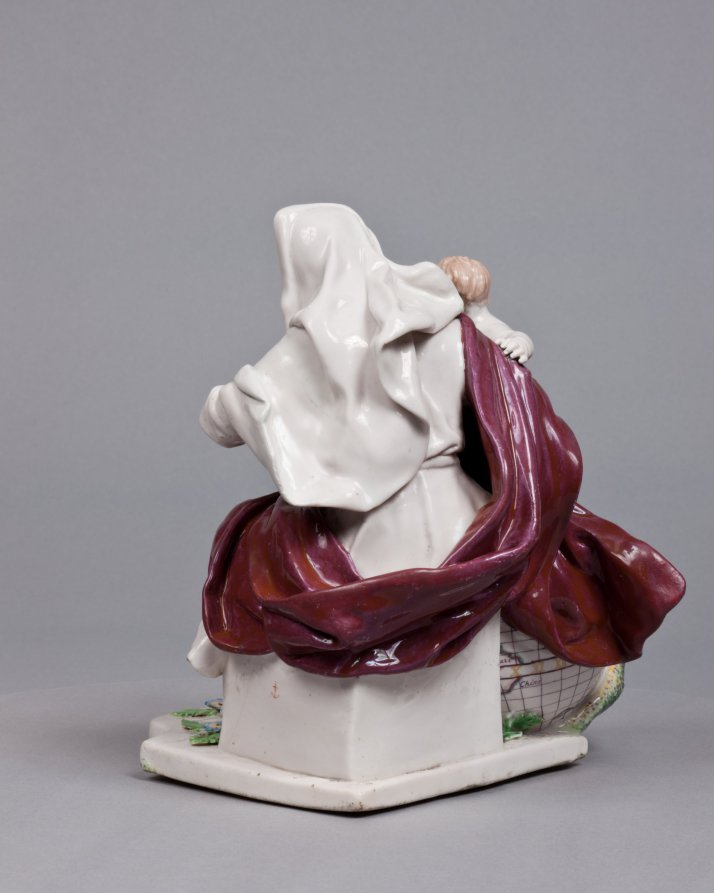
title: Madonna and Child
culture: England, Chelsea, 18th century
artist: Chelsea Porcelain Factory (Britain, London, 1745–84)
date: c. 1755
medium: porcelain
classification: Ceramic